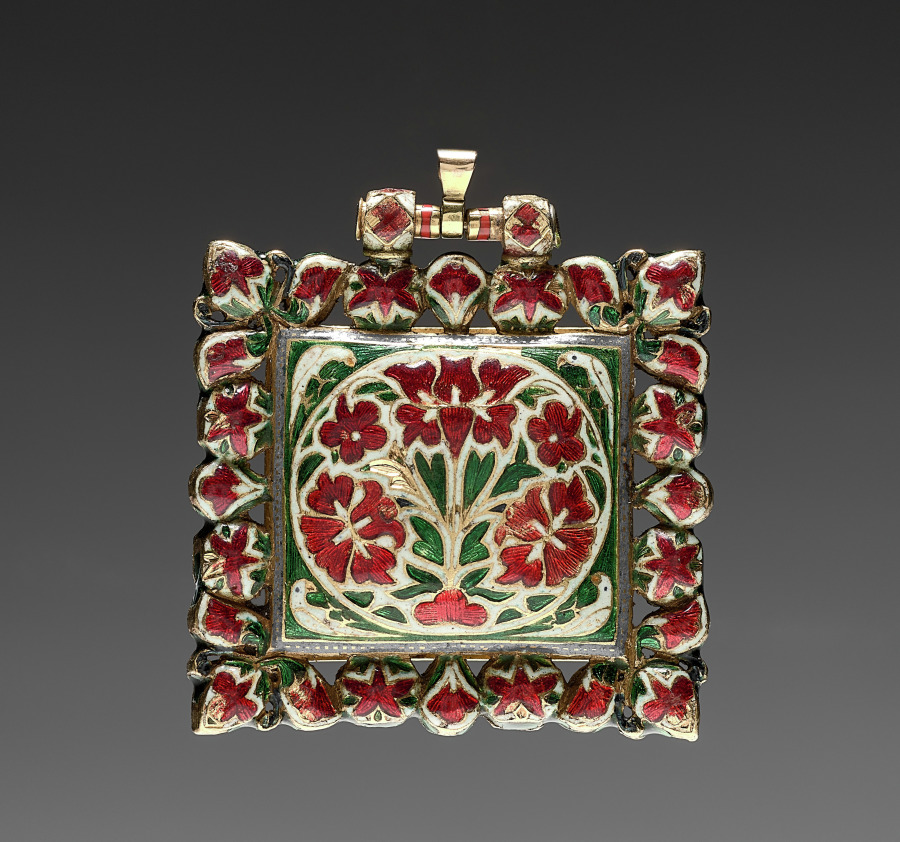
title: Pendant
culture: India, Rajasthan, Jaipur, 18th century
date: 1700s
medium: gold with semi-precious stones and enamel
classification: Jewelry